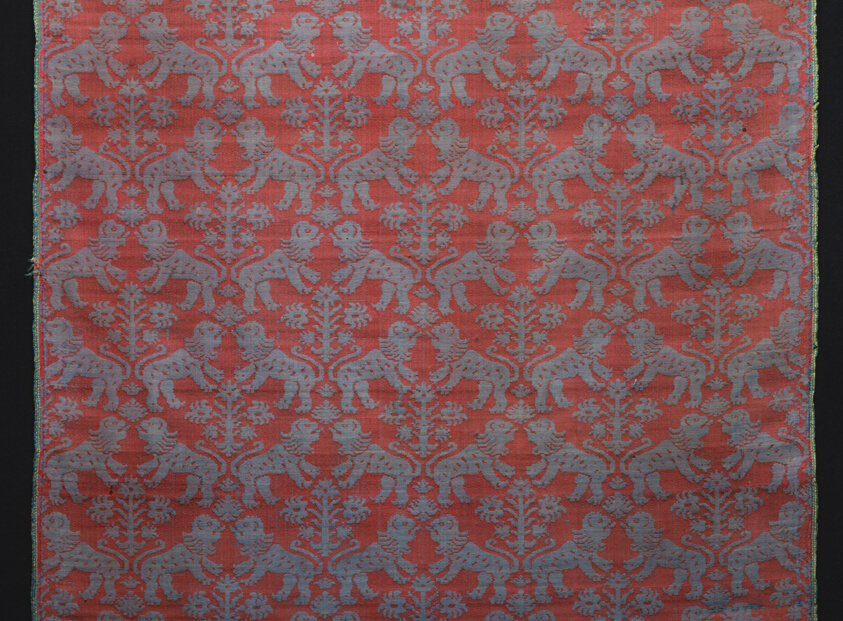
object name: Textile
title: Panel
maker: Italy, Venice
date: 16th century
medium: Silk, 4:1 satin weave self-patterned by reversing of faces (satin damask)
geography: Venice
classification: textile; weaving